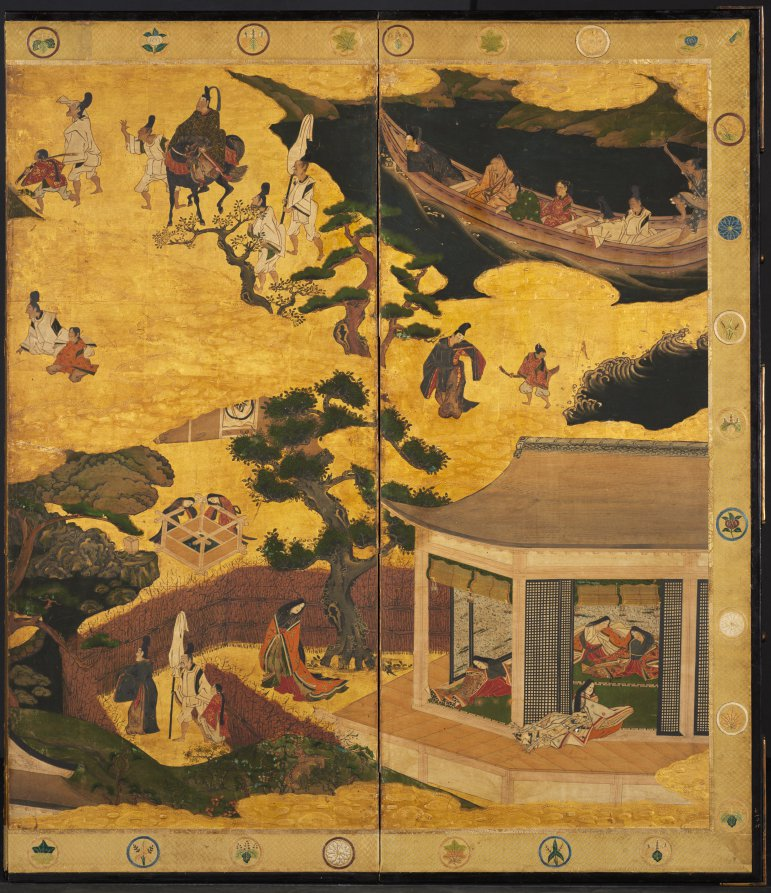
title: Scenes from the Tales of Ise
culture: Japan, Edo period (1615–1868)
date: mid-1600s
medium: One of a pair of six-panel folding screens; ink, color and gold on paper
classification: Painting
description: While the 11th-century Tale of Genji is universally regarded as Japan's literary masterpiece, the source for visual imagery in Japanese culture is rivaled by another literary classic, the Tales of Ise. A 10th-century anthology of poems interspersed with commentary, the Ise portrays the emotional and geographical journey of a courtier from the capital (Kyoto) into the countryside and beyond. The poems describe features of the natural, untamed terrain, linking them to the rather melancholy state of the traveler. Since the Tales of Ise was—and remains today—well read by educated Japanese, a person viewing these folding screens would immediately recognize its subject, organized as a series of discrete scenes read from right to left. Neither a signature nor a seal identifies the artist, but judging from related paintings, the work can be ascribed to an artist working in Kyoto during the first quarter of the 17th century in the manner of the painter Iwasa Matabei (1578–1650). This type of historical narrative composition became quite popular around 1600 among patrons favoring a distinctly Japanese style of painting which employed rich mineral pigments and a liberal use of gold.